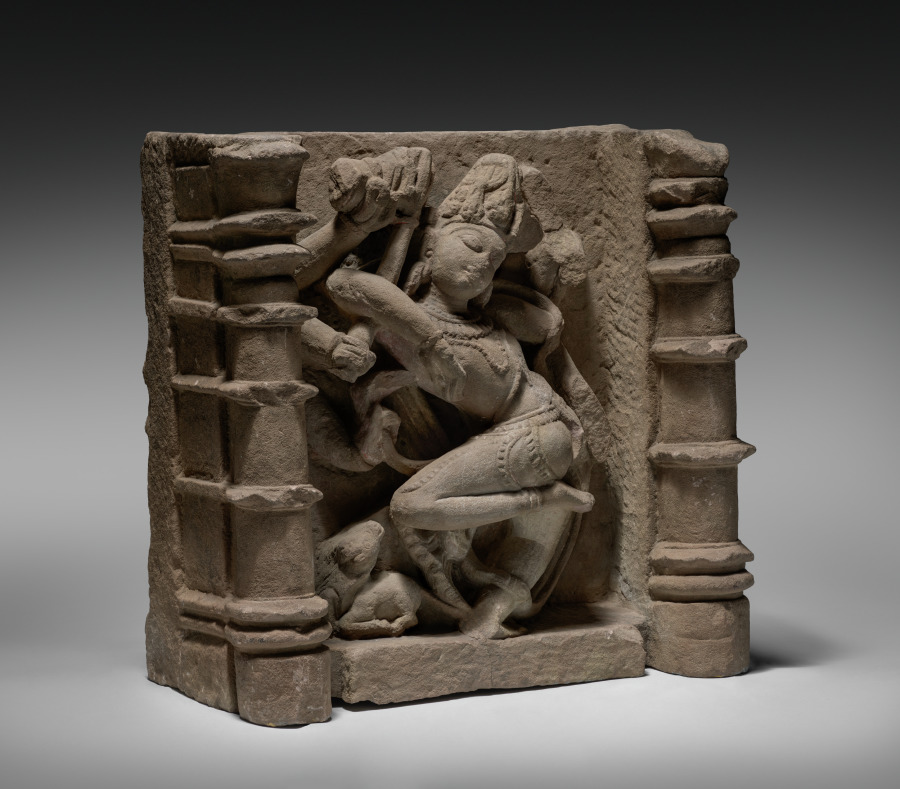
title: Eight Armed Shiva Dancing Between Two Pillars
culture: India, Rajasthan, Chandela Dynasty, 10th - 11th century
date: 900s–1000s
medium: sandstone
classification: Sculpture